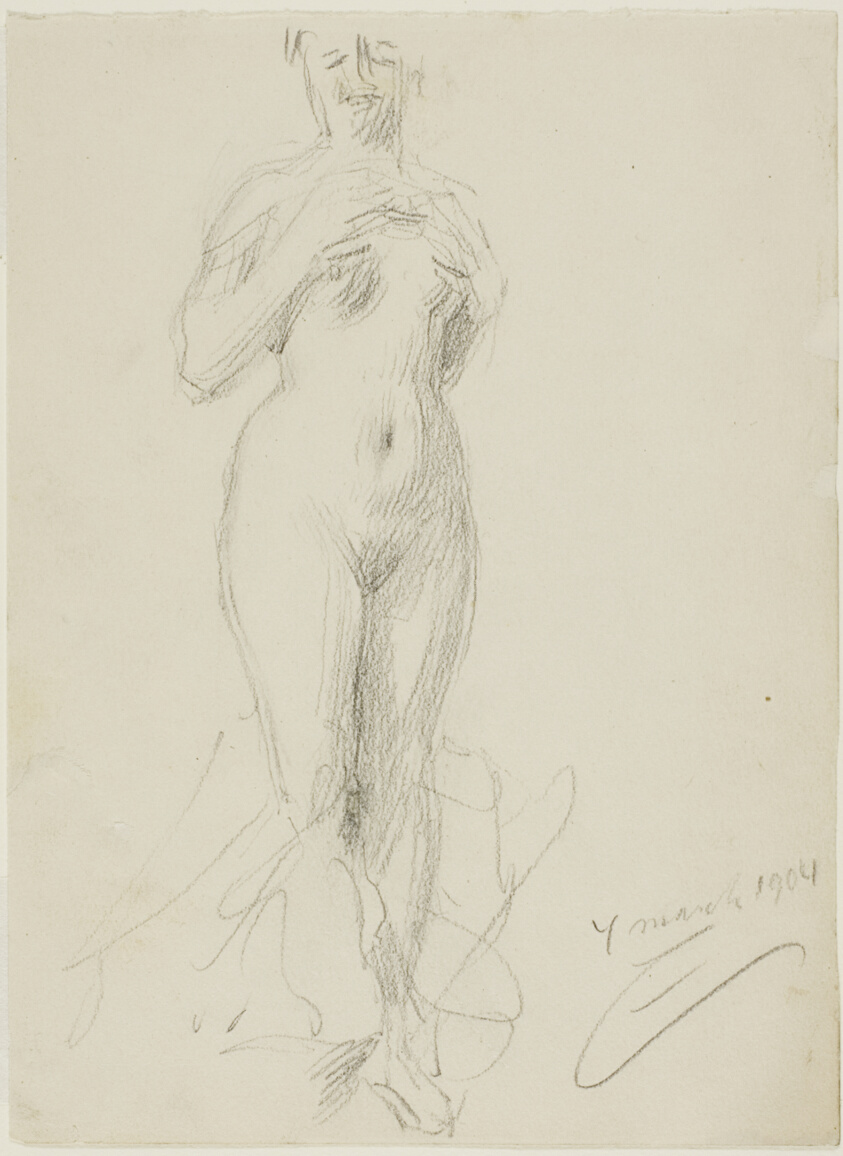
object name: Drawing and Watercolor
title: Standing Female Nude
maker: Anders Zorn (Swedish, 1860-1920)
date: 1904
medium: Graphite on buff wove paper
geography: Sweden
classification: graphite; drawings (visual works); prints and drawing